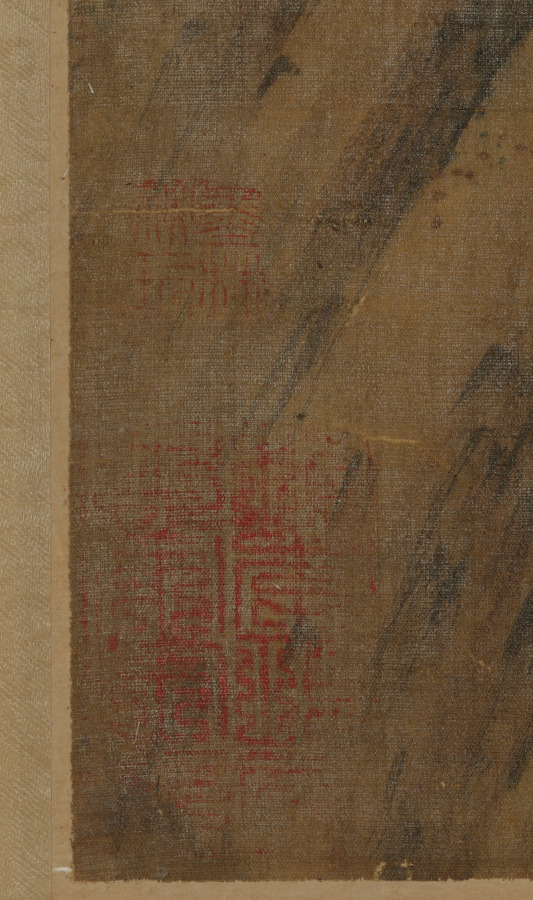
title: Hunting on Horses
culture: China, Ming dynasty (1368-1644) - Qing dynasty (1644-1911)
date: c. 1600s–1700s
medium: Hanging scroll; ink and color on silk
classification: Painting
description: This large-scale hanging scroll depicts a party hunting for waterfowl along a riverbank in the springtime. The leader is distinguished from the other five mounted hunters by his purple robe with golden dragon patterns and his white horse with a red tassel. He and his horse maintain still, dignified postures as a small white falcon captures one of the wild geese. Equestrian pursuits and hunting were particularly popular among the Khitan (also spelled “Qidan”) and Jurchen, ethnic groups who lived along China’s northeastern border. Their nomadic lifestyle intrigued the Chinese court and inspired Chinese artists to develop a painting genre showing them hunting.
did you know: This falconry scene includes one white hunting dog and four trained hunting birds.